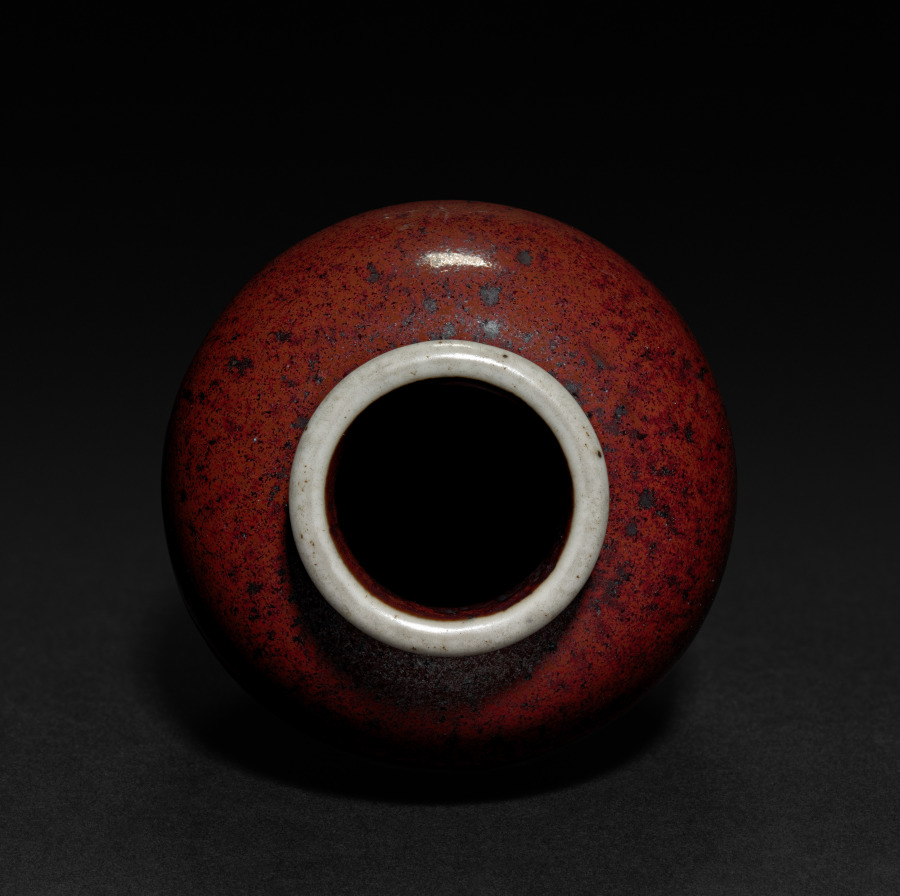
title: Jar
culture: China, Qing dynasty (1644–1911), Qianlong reign (1736–95)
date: 1736–95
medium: porcelain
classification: Ceramic